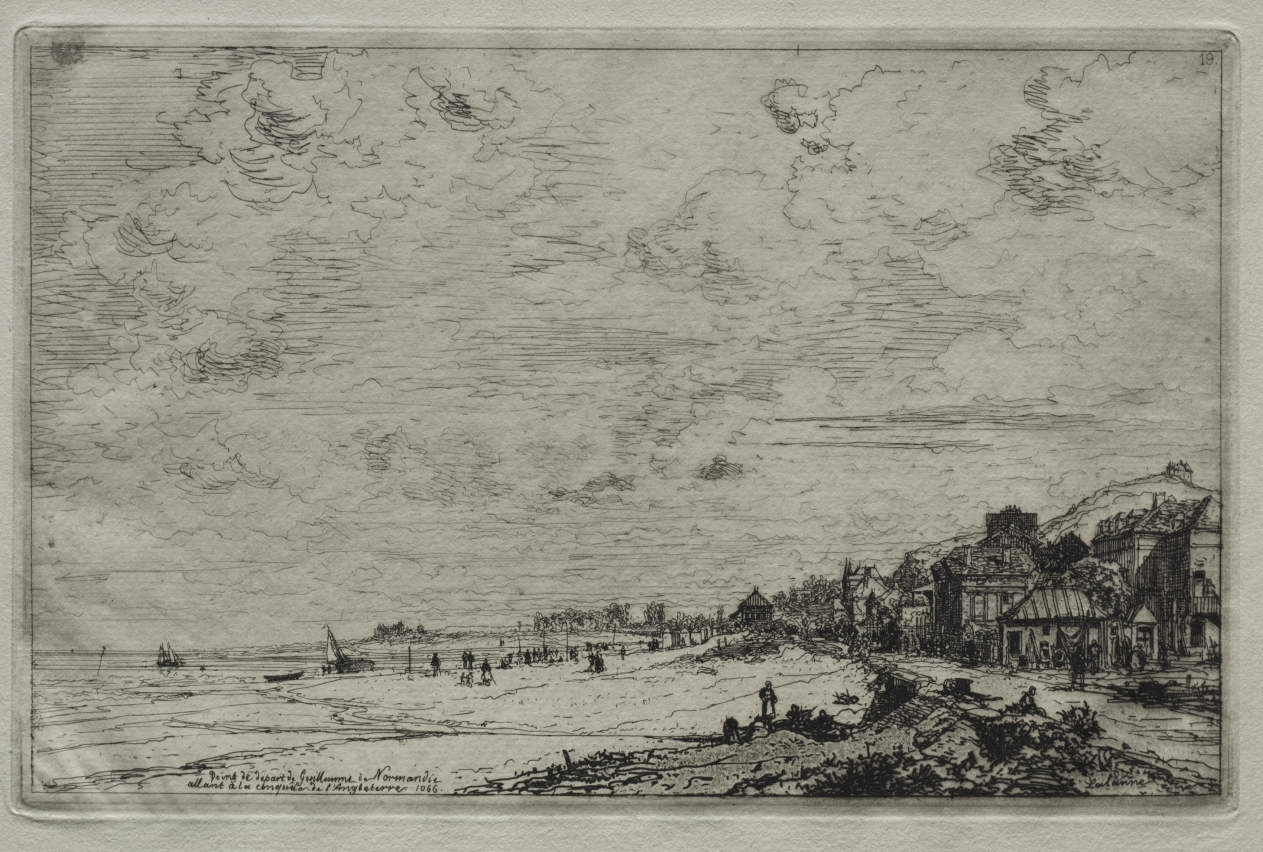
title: Beuzeval, Opening to La Dive (Calvados)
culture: France, 19th century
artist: Maxime Lalanne (French, 1827–1886)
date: 1868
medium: etching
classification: Print